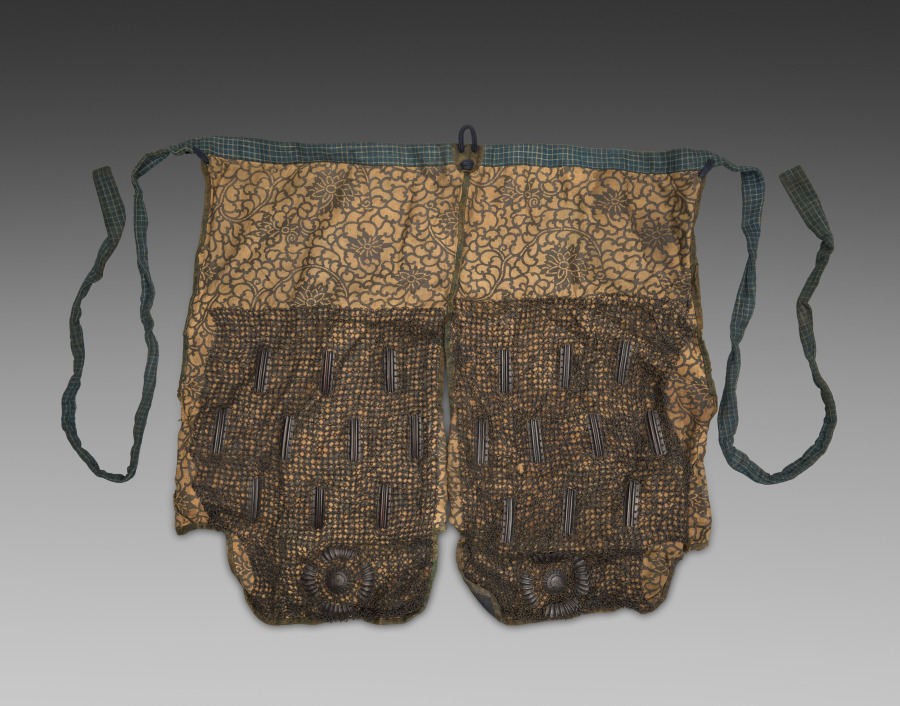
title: Fauld (Kusazuri)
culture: Japan, Edo period (1615–1868)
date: 1615–1868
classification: Arms and Armor